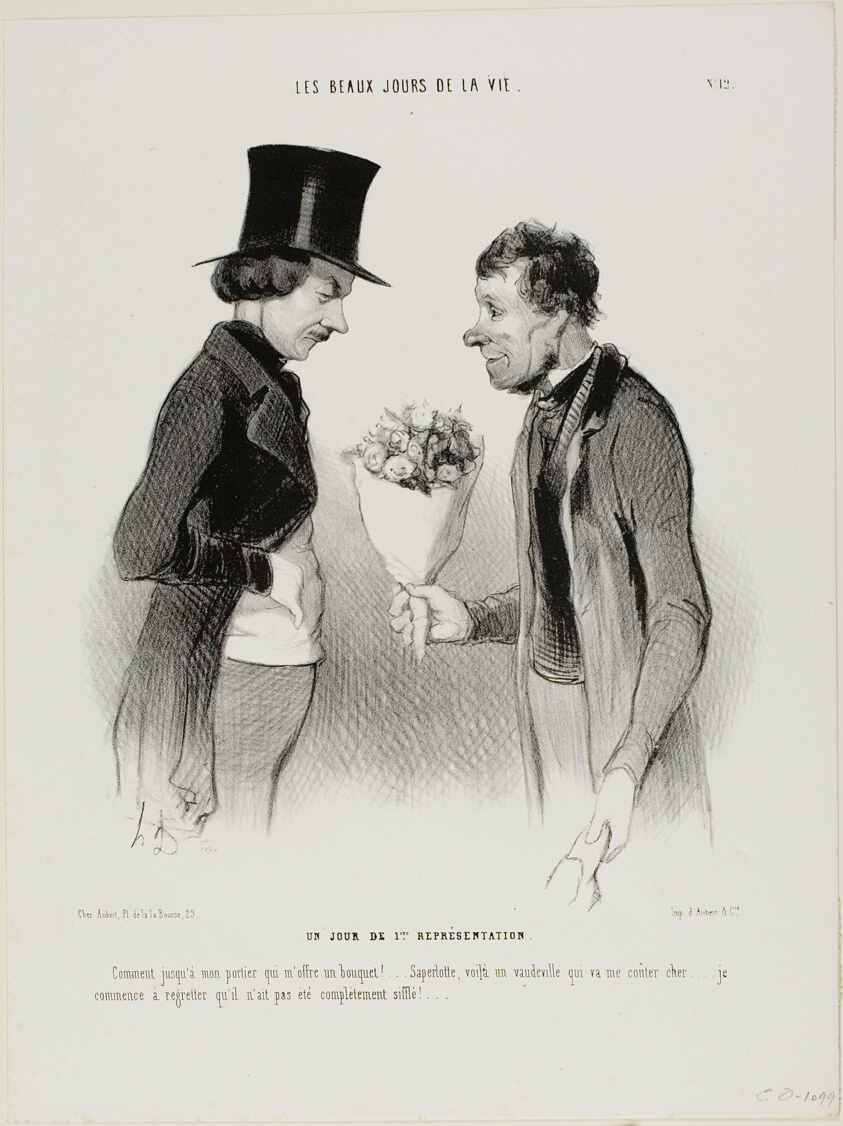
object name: Print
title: The Opening Night! “What! Even my porter offers me flowers!... Bless my soul, this comedy will cost me a fortune... I begin to regret that it hasn't been hissed off the stage altogether,” plate twelve from Les beaux jours de la vie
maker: Honoré Victorin Daumier; French, 1808-1879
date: 1844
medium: Lithograph in black on white wove paper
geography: France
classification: lithograph; print; prints and drawing